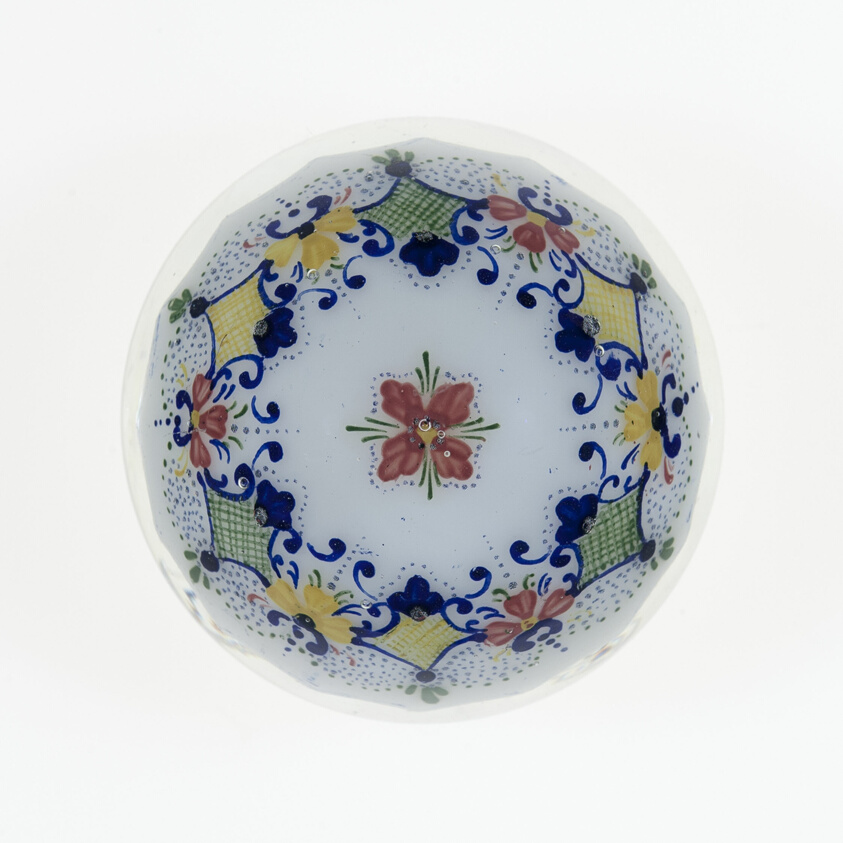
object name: Glass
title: Paperweight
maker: Possibly Bohemian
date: c. 1845–60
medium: Glass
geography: Czech Republic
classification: paperweight; glass